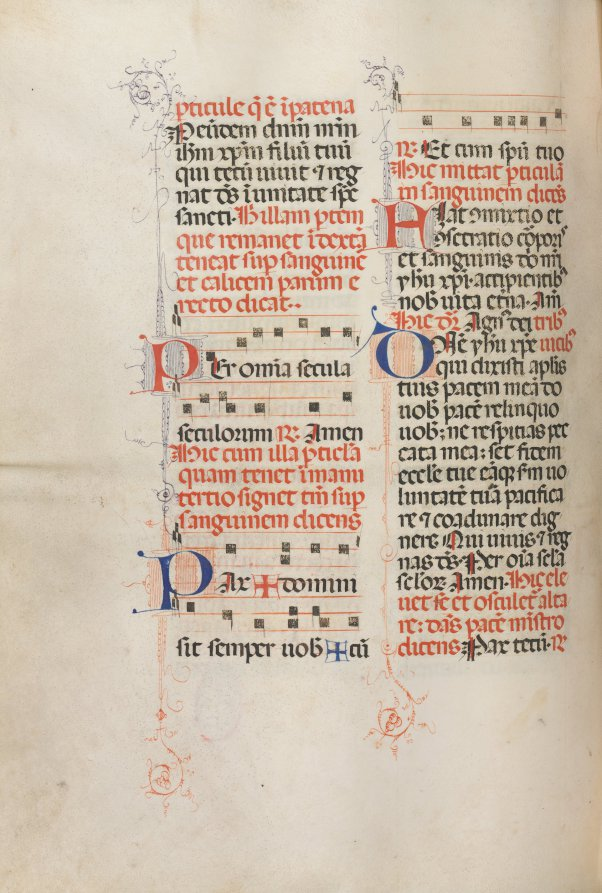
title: Missale: Fol. 190v: Music for various prayers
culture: Italy, Perugia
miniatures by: Bartolommeo Caporali (Italian, c. 1420–1503)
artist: assisted by Giapeco Caporali (Italian, d. 1478)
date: 1469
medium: ink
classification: Bound Volume